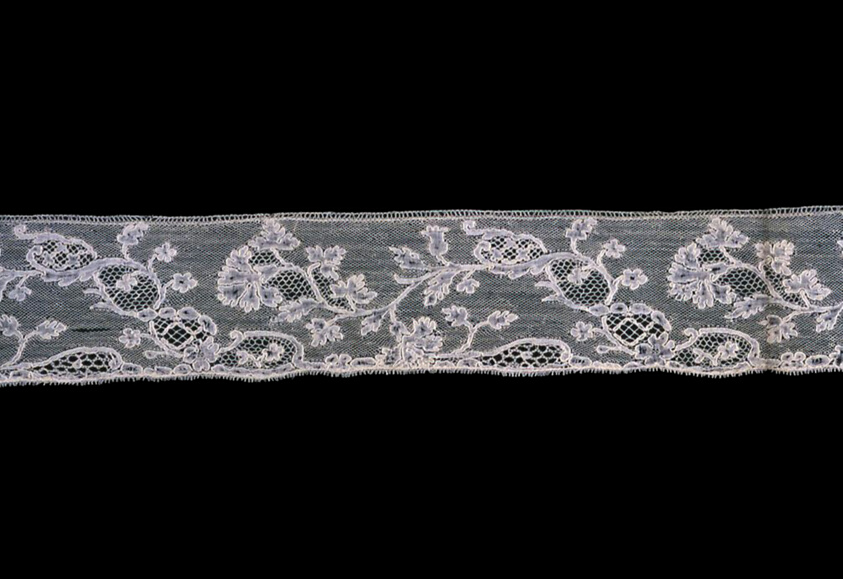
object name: Textile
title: Border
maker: Belgium, Flanders, Mechlin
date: 1750s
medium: Linen, bobbin straight lace of a type known as "Mechlin" with a Mechlin mesh ground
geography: Flanders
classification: textile; lace - bobbin; lace